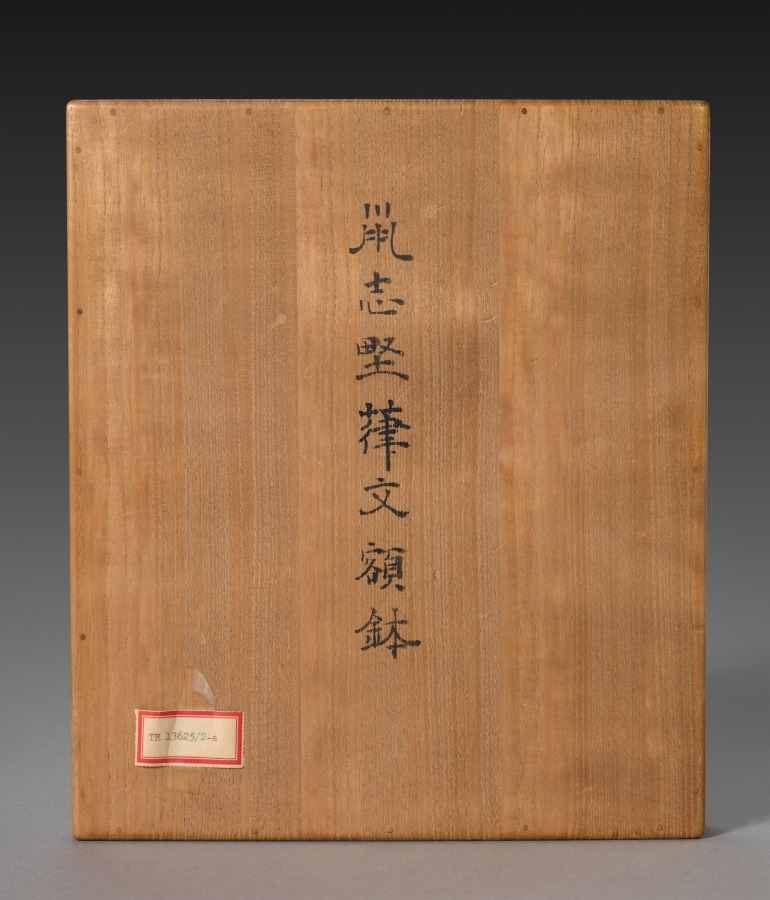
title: Dish with Autumn Grasses and Rocks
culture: Japan, Momoyama period (1573-1615) to Edo period (1615-1858)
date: late 1500s–early 1600s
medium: Stoneware with underglaze iron oxide slip and incised designs (Mino ware, Shino type)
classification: Ceramic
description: Mino ware is stoneware produced in the Mino area of present-day Gifu prefecture in central Japan. Works like this piece are called nezumi-shino, or “mouse-gray” Shino, after the glazing technique. The gray color and white design of grasses were achieved by applying an iron oxide slip to the surface and carving through it to the white clay, and then covering the whole surface in glaze and firing the object. In its design, this serving dish emulates Chinese ceramic prototypes, but its shape recalls wooden and lacquered trays commonly used in Japan at the time.